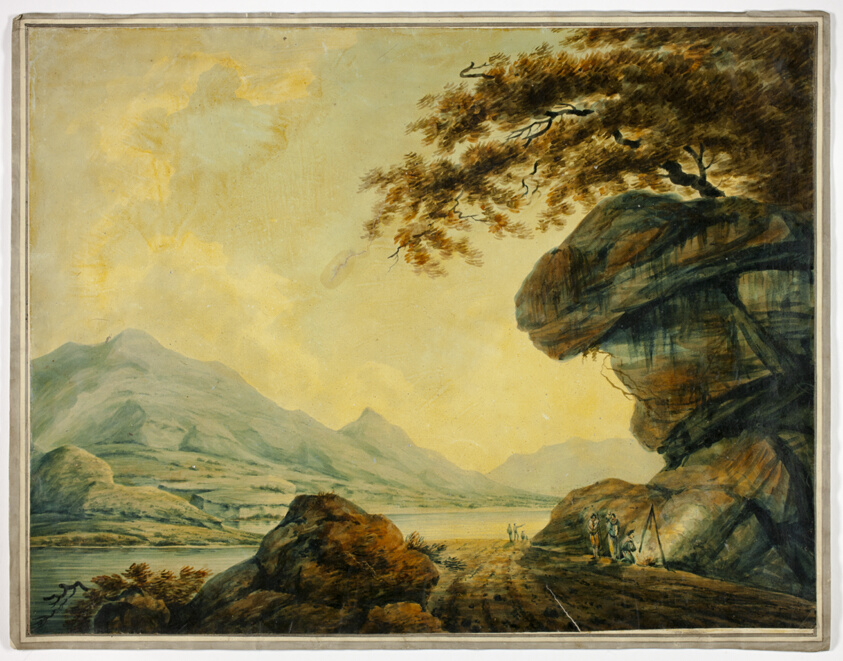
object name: Drawing and Watercolor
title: Travelers Cooking at Roadside by Lake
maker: Possibly after John "Warwick" Smith (British, 1749-1831); or attributed to Nicholas Pocock (British, 1740-1821)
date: c. 1790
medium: Watercolor, over graphite, with varnish, on ivory wove paper, laid down on card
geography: England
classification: watercolor; drawings (visual works); prints and drawing